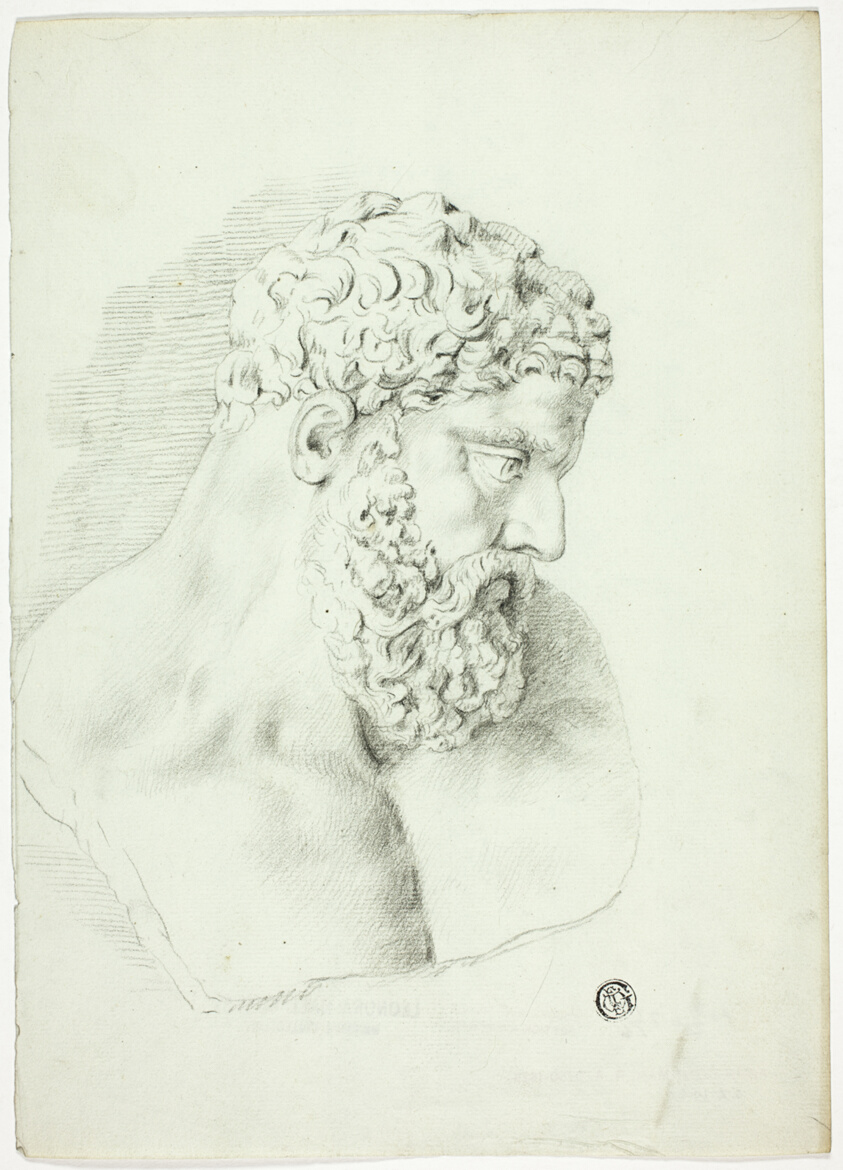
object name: Drawing and Watercolor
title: Bust of Bearded Man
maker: John Downman (English, 1750-1824)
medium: Charcoal on pale blue laid paper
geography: England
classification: charcoal; paper; drawings (visual works); prints and drawing